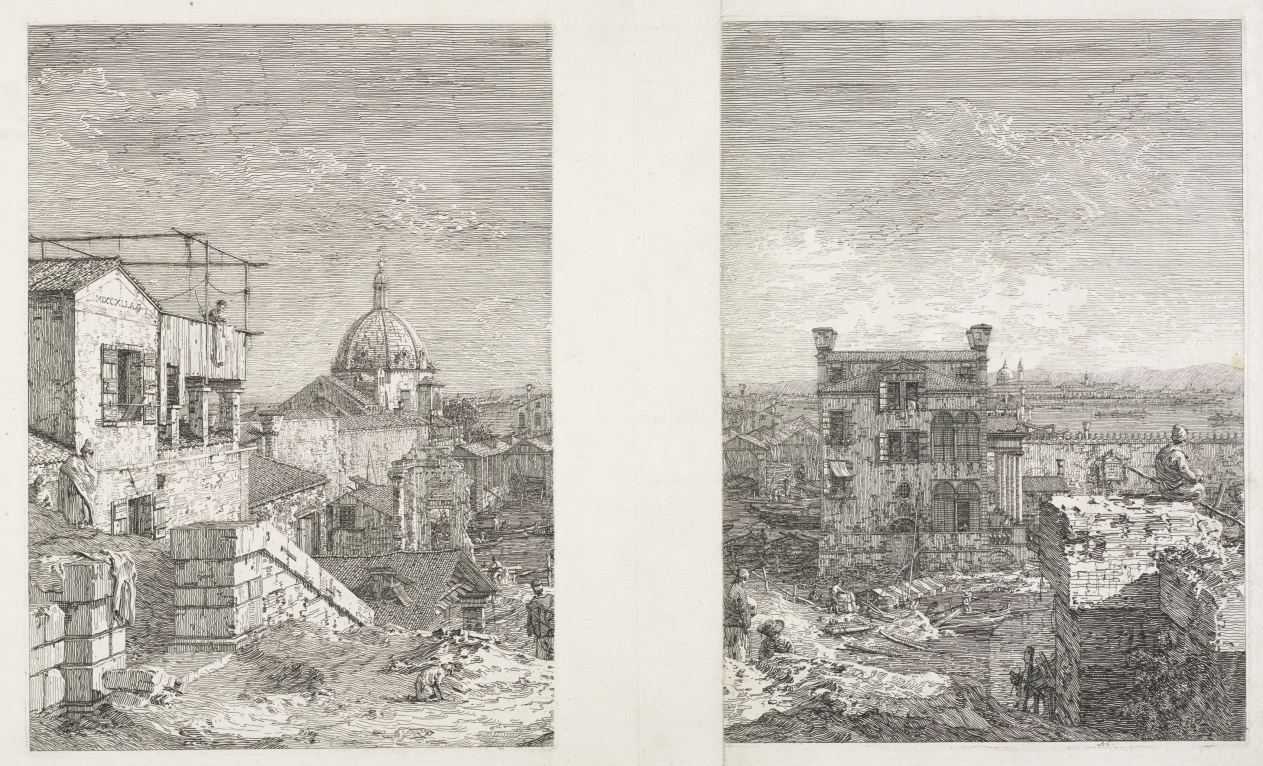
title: Views: La Maison a l'inscription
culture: Italy, Venice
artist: Antonio Canaletto (Italian, 1697–1768)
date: 1735–1746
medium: etching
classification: Print